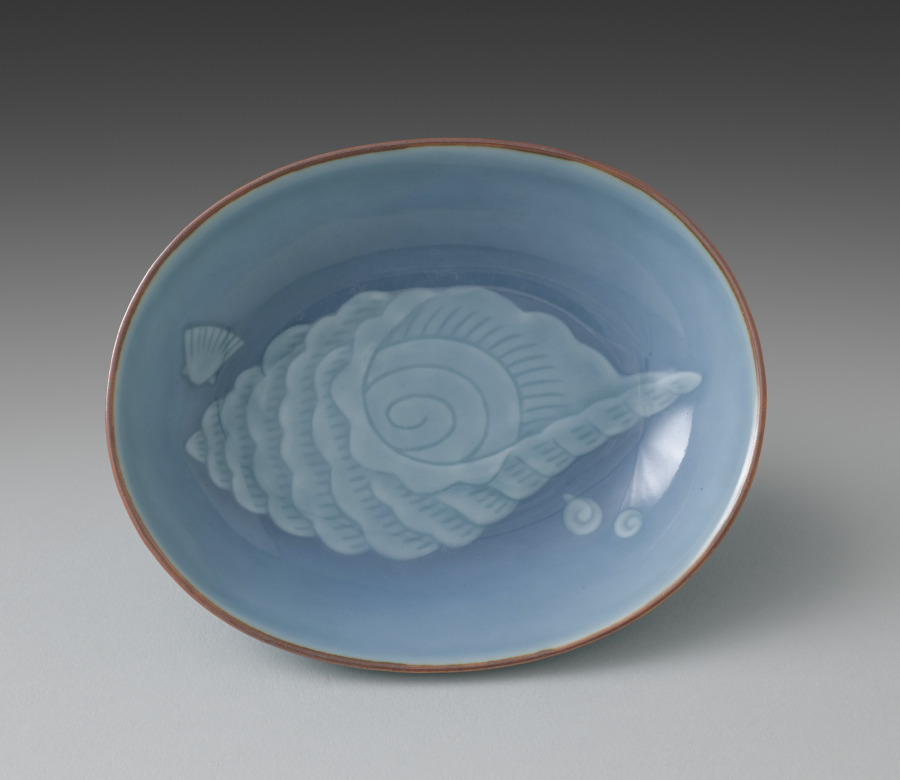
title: Dish from Dishes with Shells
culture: Japan, Taishō period (1912–26)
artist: Seifū Yohei IV (Japanese, 1872–1951)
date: 1914–46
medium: One from a set of five dishes; porcelain with blue glaze, iron oxide, and molded design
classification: Ceramic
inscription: 清風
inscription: 清風造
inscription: 清風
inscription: 成山清風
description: Yohei IV chose an aquatic theme for this set of five mukōzuke, side dishes. He added an iron oxide rim and used a concentrated blue glaze on both the interior and exterior. The glaze, named on the box lid, is his father’s “evening moon” (tsukiyoi) color. The conch in relief takes up the entire bottom of the dish. Up the sides are two snails on one end and on the other a scallop. This results in a boldly graphic, less realistic effect.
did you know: This set of dishes, mukōzuke, could be used for serving small side dishes at a tea gathering.